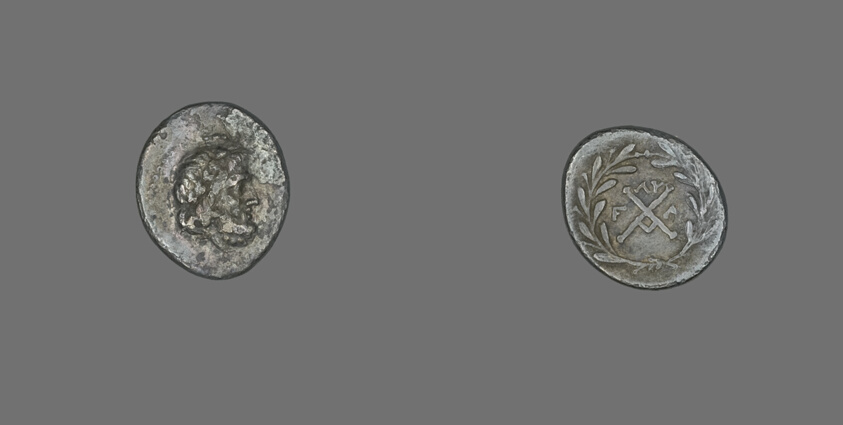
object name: Coin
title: Hemidrachm (Coin) Depicting the God Zeus Amarios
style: greek, ancient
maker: Greek; Elis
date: 191-146 BCE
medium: Silver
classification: coin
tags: gods (deities), zeus